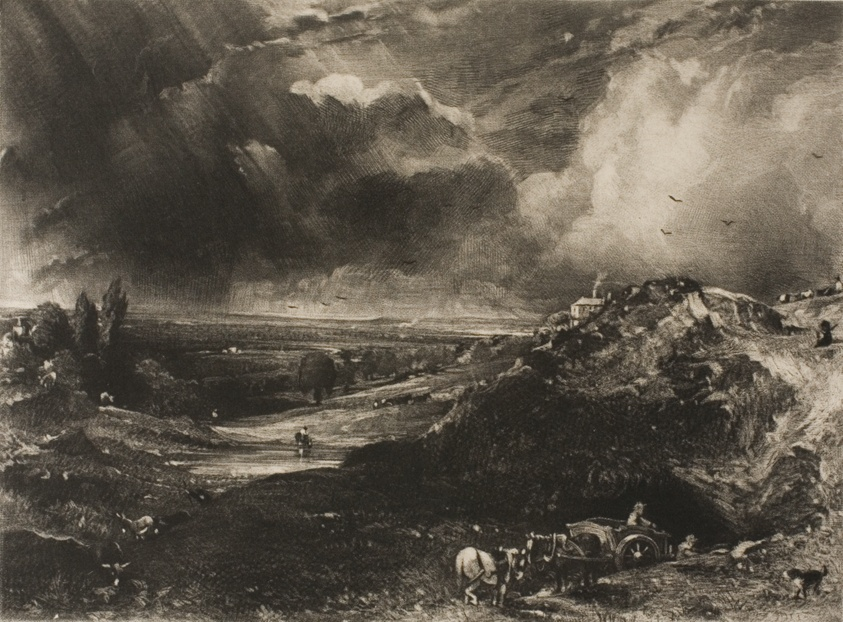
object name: Print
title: A Heath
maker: David Lucas (English, 1802-1881); after John Constable (English, 1776-1837)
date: 1831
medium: Mezzotint in black ink on heavy ivory wove paper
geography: England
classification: mezzotint; print; prints and drawing